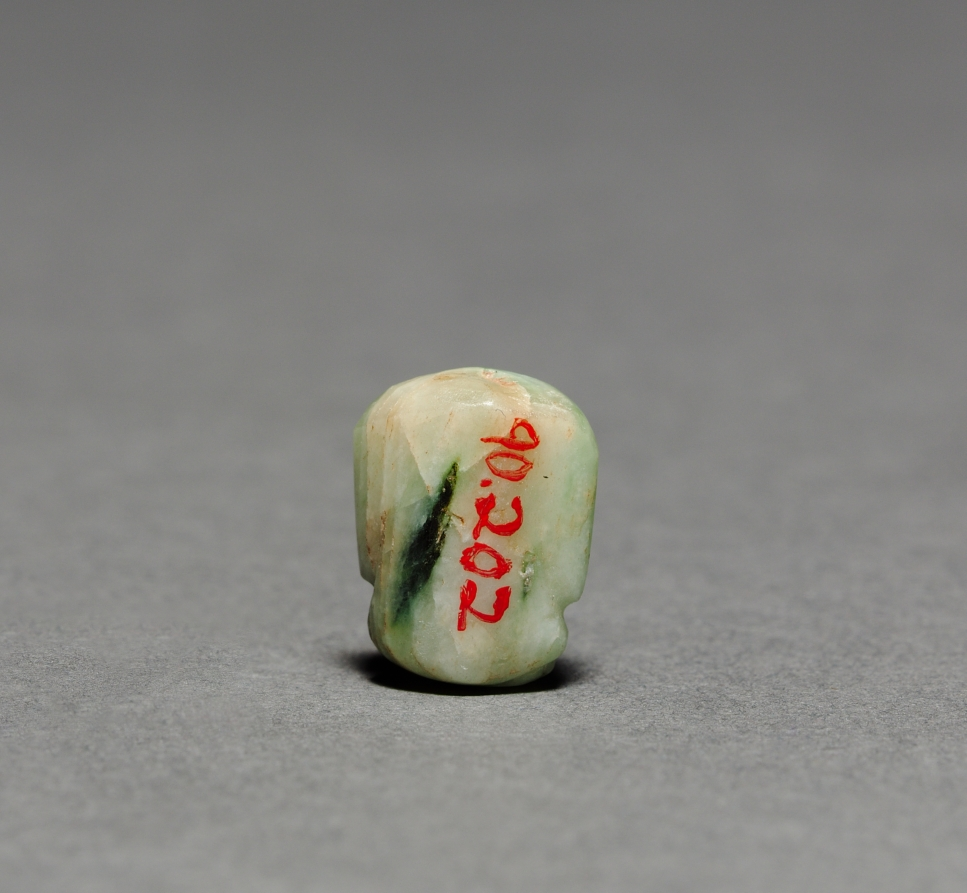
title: Seated Figurine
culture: Mexico, Oaxaca, Xoxo, Mixtec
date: 1200–1519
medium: jade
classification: Sculpture